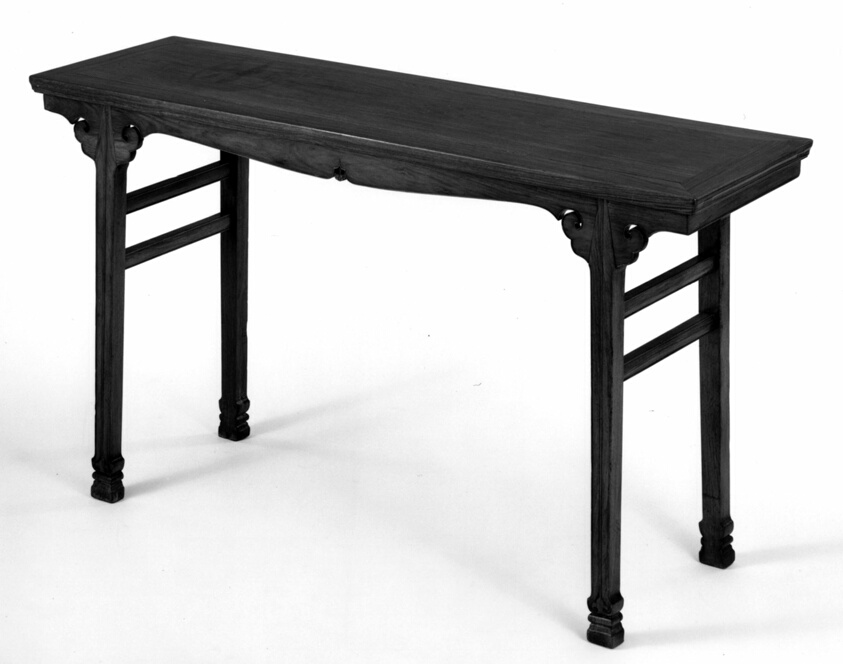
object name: Furniture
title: Painting Table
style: Chinese (culture or style)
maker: China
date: Qing dynasty (1644–1911), late 17th/early 18th century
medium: Huanghuali wood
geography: China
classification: table; wood; furniture; asian art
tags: furniture